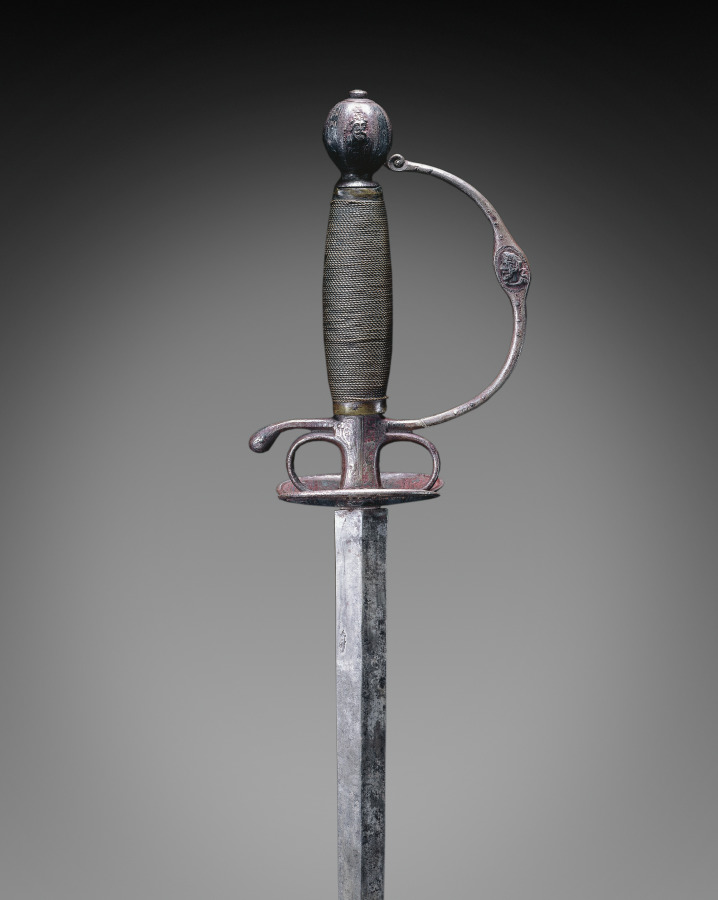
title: Small Sword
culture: France, 17th century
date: c. 1650–70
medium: steel, iron, silver inlay; wood and brass wire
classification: Arms and Armor